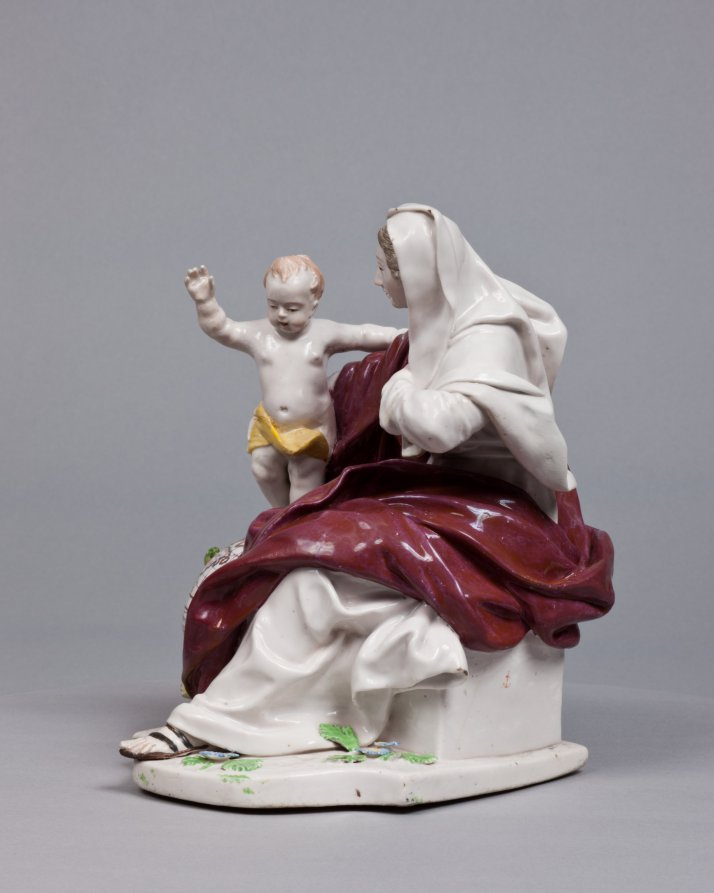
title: Madonna and Child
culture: England, Chelsea, 18th century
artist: Chelsea Porcelain Factory (Britain, London, 1745–84)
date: c. 1755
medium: porcelain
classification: Ceramic